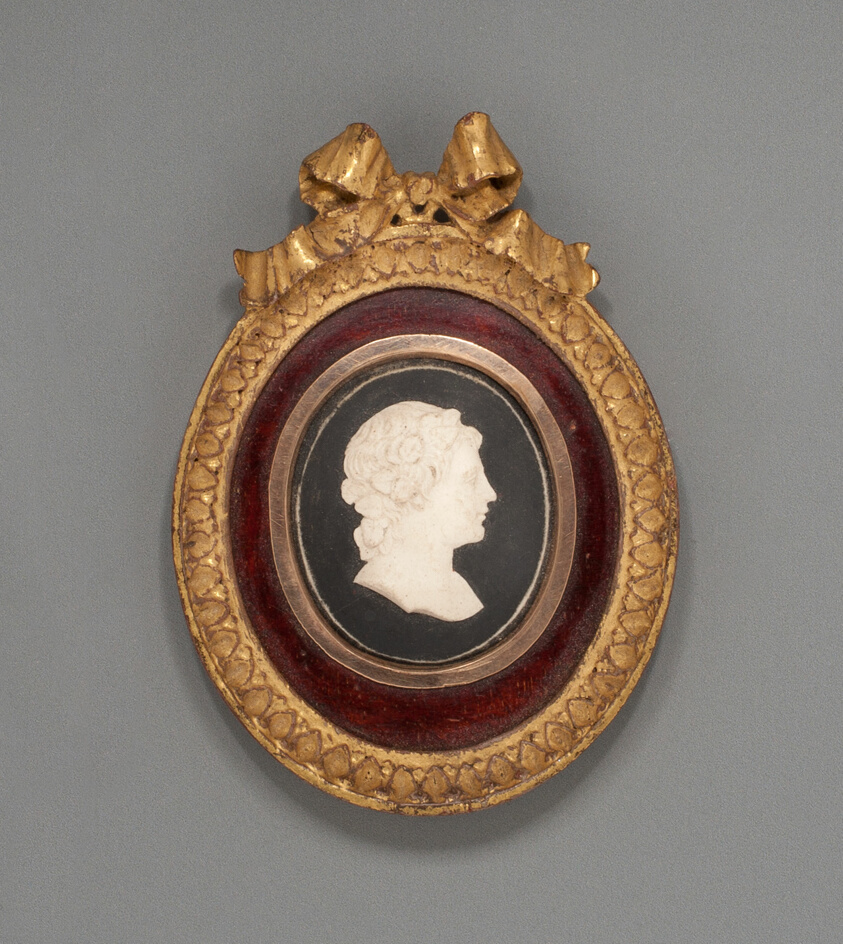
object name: Ceramics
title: Cameo with Head of a Woman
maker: Wedgwood Manufactory (England, founded 1759)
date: Late 18th century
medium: Stoneware (jasperware)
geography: Burslem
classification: cameo (sculpture); sculpture; stoneware; european decorative arts; ceramics